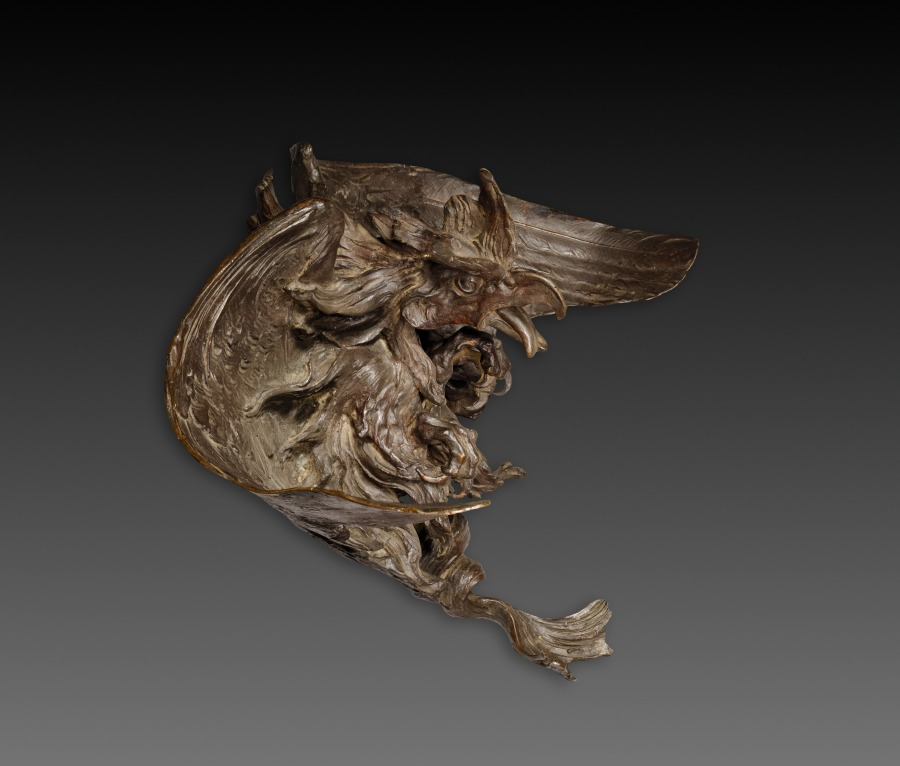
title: Wild Basilisk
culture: Germany, 19th century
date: 1800s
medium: bronze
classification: Sculpture